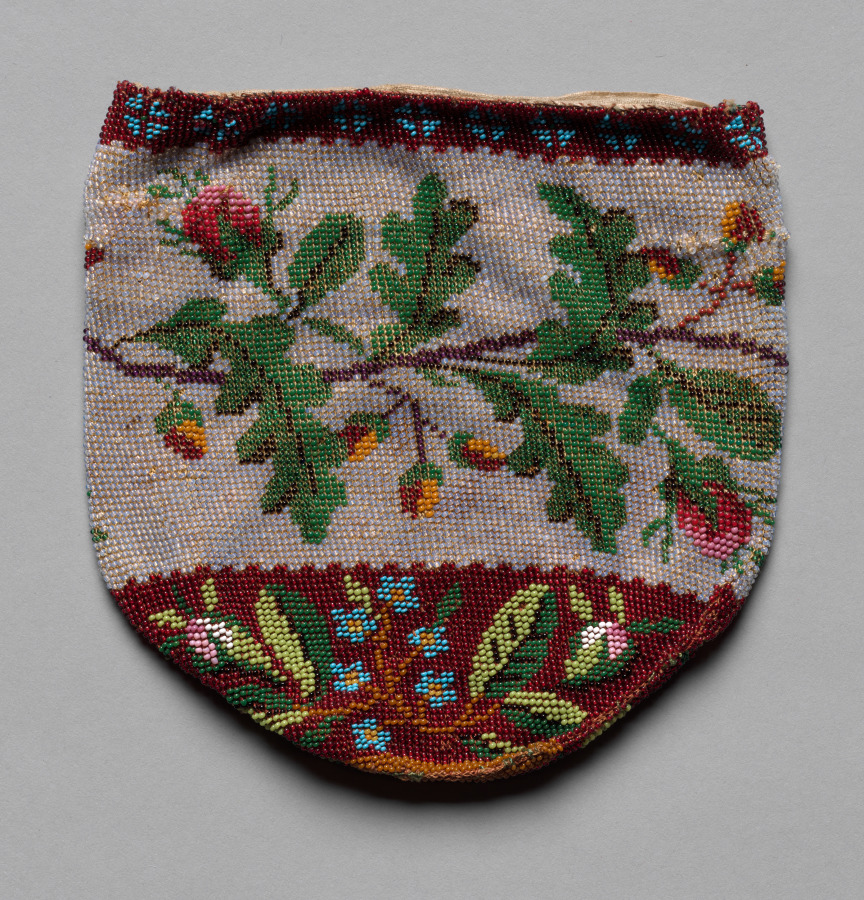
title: Beaded Bag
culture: America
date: 19th century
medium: glass beads, cotton? lining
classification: Garment